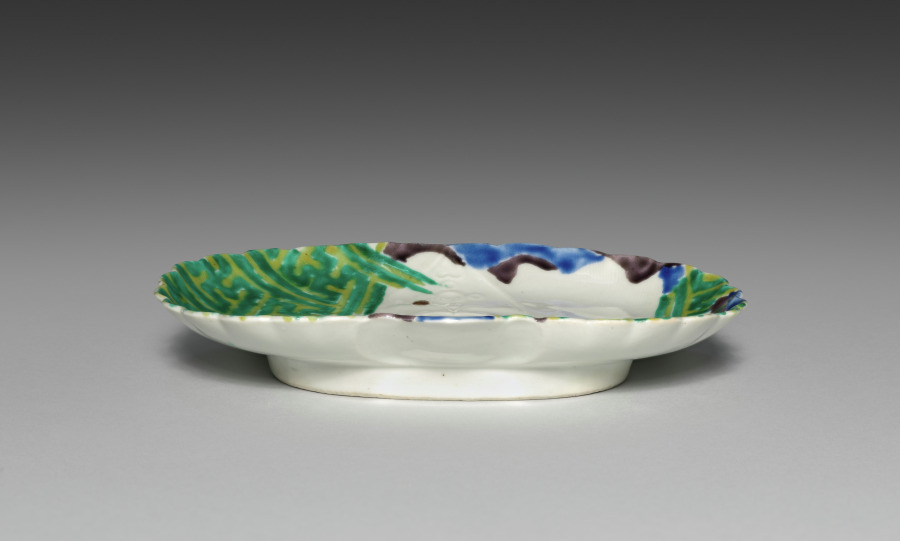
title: Ginkgo Leaf-Shaped Small Dish (Kozara) with Stylized Key-Fret Design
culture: Japan, Edo period (1615–1868)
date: mid-1600s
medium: Porcelain with molding and overglaze color enamel (Hizen ware, Matsugatani kilns, Nabeshima type)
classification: Ceramic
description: This dish combines a precisely molded shape with a freehand design in overglaze color enamels.